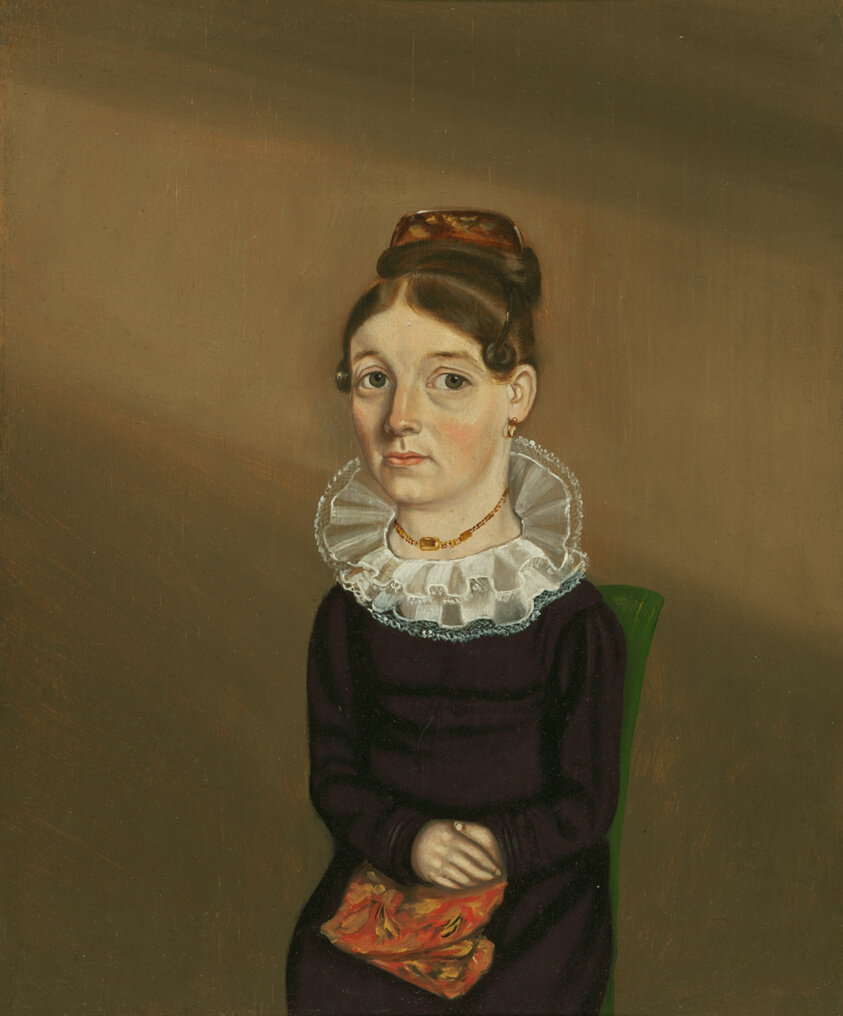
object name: Painting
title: Mrs. William Bonham (Ann Warford)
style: Folk Art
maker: William Bonnell (American, 1804–1865)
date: March 6, 1825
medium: Oil on panel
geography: United States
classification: painting; american arts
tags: fashion, people, portraits